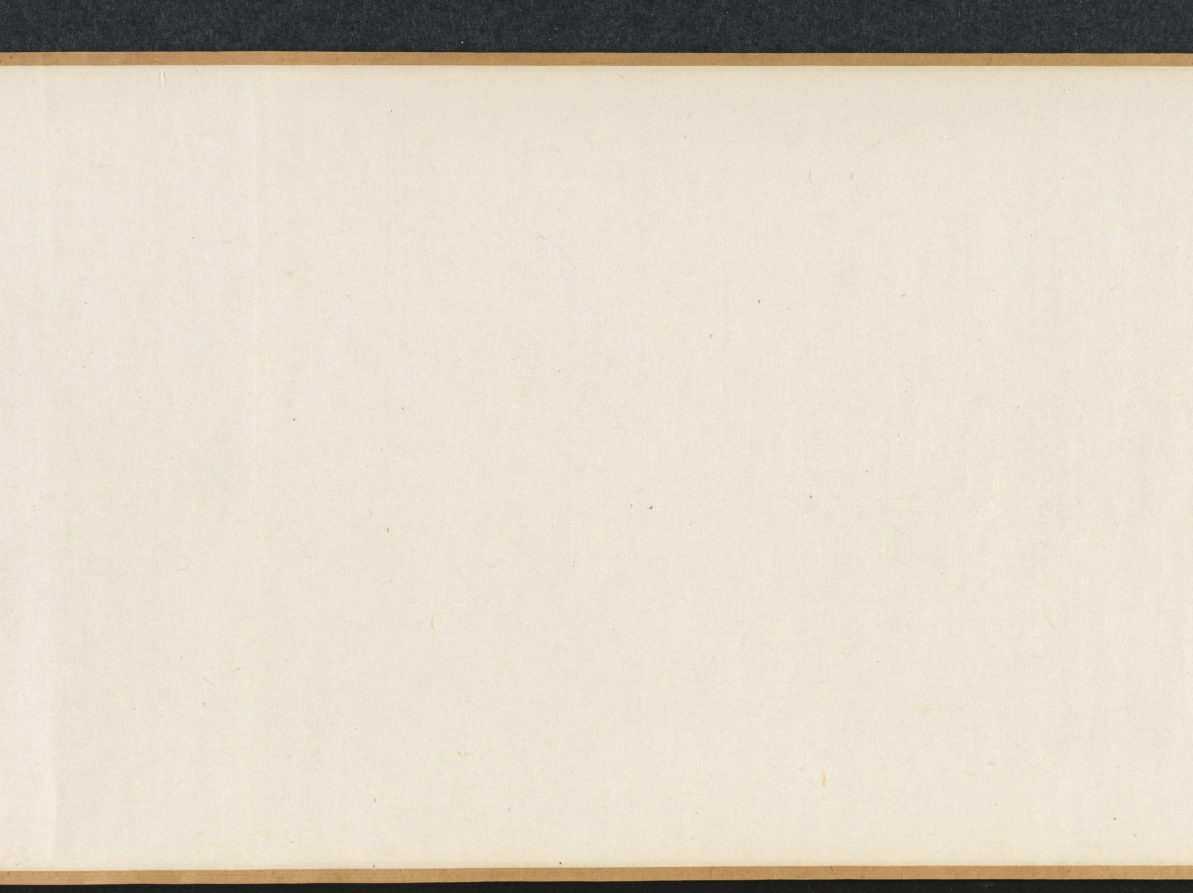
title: Zhao Mengfu Writing the Heart (Hridaya) Sutra in Exchange for Tea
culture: China, Ming dynasty (1368–1644)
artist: Qiu Ying (Chinese, 1494–1552)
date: 1542–43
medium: handscroll, ink and light color on paper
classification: Painting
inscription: Inscription accompanying text of "Heart" sutra, by Wen Zhengming 文徵明 (1470-1559): Zhengming 徵明, written in a boat at Kunshan 崑山, on the twenty-first day of the ninth month, in the renyin 壬寅 year, the twenty-first year of the Jiajing era [1542].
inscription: Colophon by Wang Shih-mou: Chou Yü-shün [Feng-lai] of K'un-shan was a scholarly, refined connoisseur of antiquities. He had acquired the poem written by Chao Ch'eng-chih [Chao Meng-fu] about the exchage of tea for Chao's calligraphy of the Prajna sutra. But the sutra itself, also written by Chao Meng-fu, is lost. He therefore asked Ch'iu Shih-fu [Ch'iu Ying] to do a painting and had Wen Cheng-ming, the artist-in-attendance, write the Hridaya Sutra in the "small, regular" style for replacement. Both works are so excellent that even Chao Meng-fu himself would certainly applaud if he should be reborn to see them. I, Shih-mou, had gotten possession of this scroll from the family of Chou Yü-shün, and since it was so wonderfully matched with one of the treasures in my collection. the Hridaya Sutra written by Chao Meng-fu for Priest Li in "running script," like the reuniting of two halves of a jade pi, I completed the scroll with the several colophons written for the "tea-exchange" poem. I did this because the painting of Ch'iu Ying and the calligraphy of Wen Cheng-ming are definitely masterpieces by themselves with absolutely no need to depend on any of the colophons written for the Chao Meng-fu poem. Furthermore, the two sons of Wen Cheng-ming, Shou-ch'eng [Wen P'eng] and Hsiu-ch'eng [Wen Chia]. have each written a colophon explaining the reason for replacing the calligraphy. As their writings are both acceptable for high standard, I didn't want to throw them away. [So by separating these into two scrolls] I was able to get two complete works of art in one clever stroke. I was quite pleased with myself, and hope that those who see this scroll shall not get suspicious because of the missing colophons. Wang Shih-mou wrote in his Jih-sun-chai study, on the first day of the tenth month, in the chia-shen year of the Wan-li era [1584].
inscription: Colophon by Wen P'eng: I-shao [Wang Hsi-chi] wrote in exchange for a flock of geese. Su Tung-po wrote in exchange for meat. Both episodes have become legends of a thousand years. Sung-hsüeh [Chao Meng-fu] "teased" Priest Kung for tea, and the story was immediately immortalized in the poems by all the famous scholars of the times. Indeed, how could one say his humor and elegance are not equal to the ancient worthies? Unfortunately, the poetry has survived but the writing of the sutra is lost. Yü-shün [Chou Feng-lai] therefore asked my father to make up the writing and so here is the complete work of art. Respectfully inscribed by Wen P'eng in the mid-summer of 1543.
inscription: Colophon by Wen Chia: Sung-hsüeh [Chao Meng-fu], in exchanging tea leaves for his writing of the Prajna, had put himself in the company of Yu-chün [Wang Hsi-chih] who exchanged geese for his writing of the Huang-t'ing sutra [the Yellow Chamber, or the Wai-ching ching, a Taoist text attributed to the Yellow Emperor]. However, was this romantic and cultivated gesture really intended for such small things? Actually, he was only proud that the excellence of his calligraphy had made him worthy to be the successor of the Ch'in Dynasty master. Since, very unfortunately, Chao Meng-fu's writing [of the Prajna] was already lost, my father therefore agreed to replace it, and did the calligraphy in the style of the Yellow Chamber. In addition, Yu-shün [Chou Feng-lai] had asked Mr. Ch'iu Shih-fu [Ch'iu Ying] to do a painting of the sutra writing story in the style of Li Lung-mien at the head of the scroll. Now it would seem the entire episode should go down in history for immortality. Respectfully recorded by Wen Chia, on the eighth day of the eighth month, in the year of k'uei-mao [1543]. trans. WKH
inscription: 4 colophons and 23 seals: 1 colophon, dated 1543, and 2 seals of Wen Peng (1498-1573); 1 colophon, dated 1543, and 2 seals of Wen Chia (1501-1583); 1 colophon, dated 1584, and 3 seals of Wang Shih-mou (1536-1588); 2 seals of Chou Feng-lai (16th c.); 3 seals of Sung Lo (1634-1713); 5 seals of the Ch'ien-lung emperor (r. 1736-95); 1 colophon, dated 1902, and 1 seal of Fei Nien-tz'u (1885-1905); 4 seals of Wan-go H. C. Weng (b. 1918); 1 seal unidentified.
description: The Yuan dynasty calligrapher Zhao Mengfu (1254–1322) is said to have transcribed the Heart Sutra for a certain priest named Li in exchange for tea. Later, during the Ming dynasty, the professional painter Qiu Ying from Suzhou painted this scene for his patron. Here, Zhao Mengfu holds a brush and has a piece of paper laid out before him. On the table is an ink stone, an ink stick, and a small water dropper. Drops of water would dissolve the ink stick into liquid ink when it was ground on the flat square stone.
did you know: Qiu Ying was born to a peasant family, but his natural talent led him to a successful career as a professional painter with wealthy patrons.